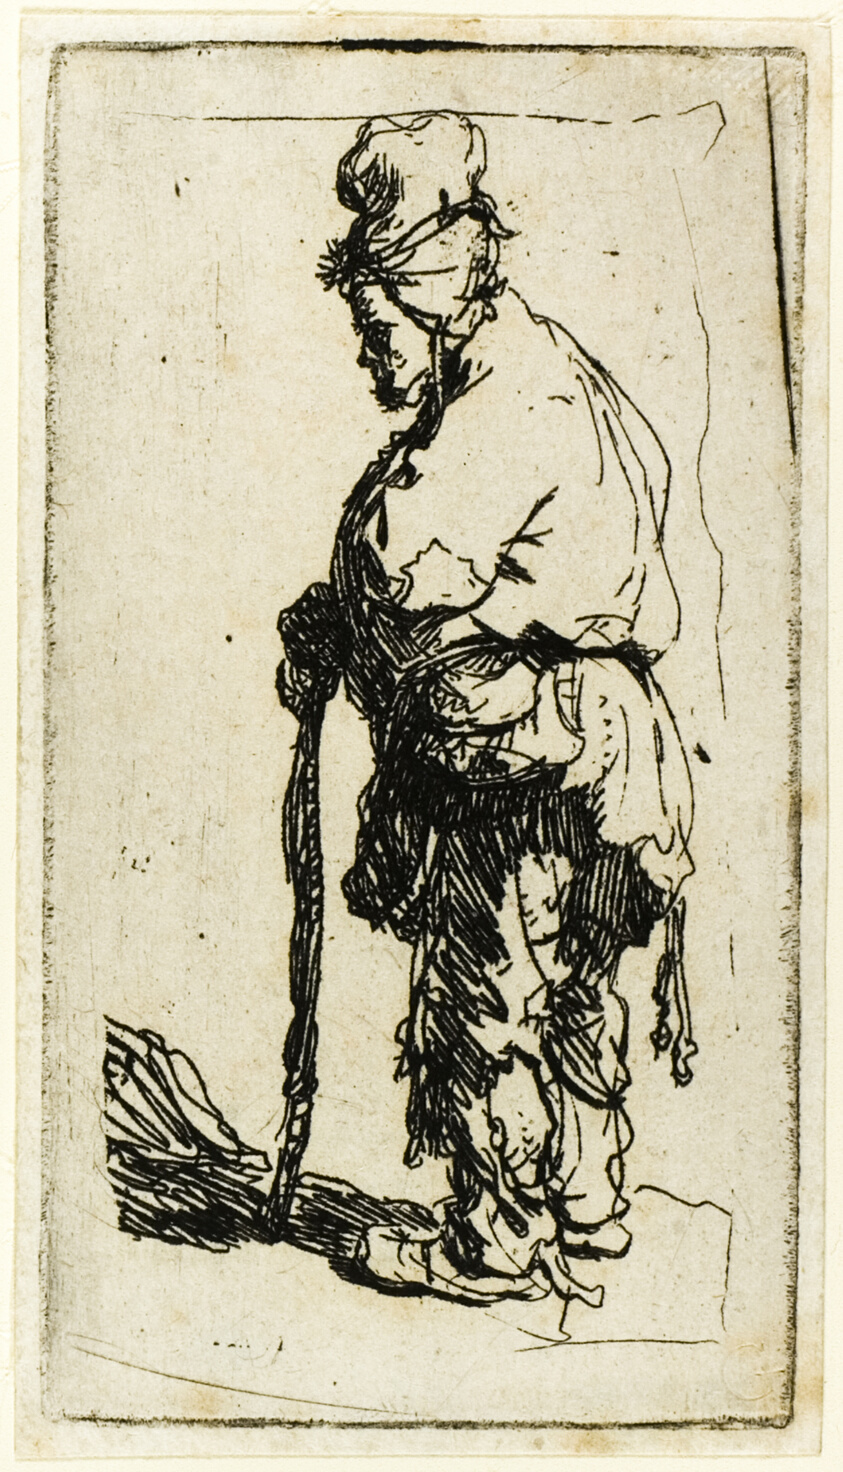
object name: Print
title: Beggar Leaning on a Stick, Facing Left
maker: Rembrandt van Rijn (Dutch, 1606-1669)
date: c. 1630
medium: Etching on ivory laid paper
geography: Holland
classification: etching; print; prints and drawing; paper